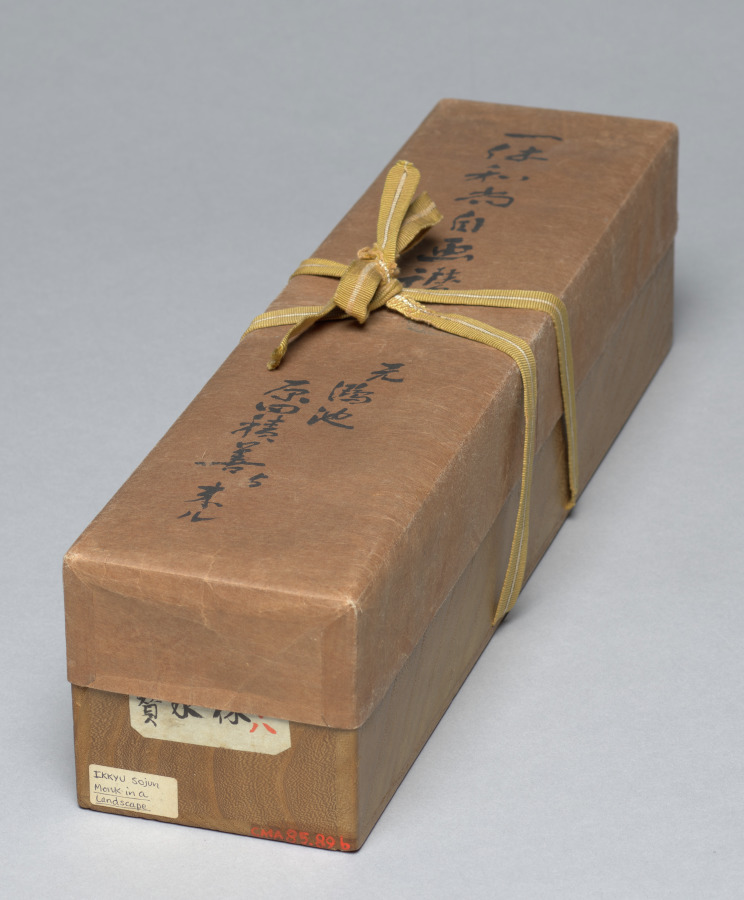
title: Listening to the Wind in the Pines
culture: Japan, Muromachi period (1392–1573)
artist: Ikkyū Sōjun (Japanese, 1394–1481)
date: 1400s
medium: hanging scroll; ink on paper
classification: Painting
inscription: 山居僧聴松風/何須臨済徳山禅一箇住山/三十年公案工夫了畢後/長松風静罷参眠 (transcribed by Trevor Menders with Zheng Xiaoying 2017, revised by Osvaldo Mercuri 2021)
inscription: 紫野龍寶門客东海純一休老和尚畫と詩一筆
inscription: 落款 一休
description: A monk sits in contemplation below an overhang covered with pine. The poem, titled "Monk in the Mountains Listening to the Wind in the Pines," refers to two Chinese Chan (Zen) Buddhist monks active in the ninth century. It may be translated as follows: Why must the Zen of Rinzai (Linji Yixuan) and Tokusan (Deshan Xuanjian) reside in a single temple for thirty years? Once he's solved his kōan, (the monk) ends his practice and falls asleep in the quietness of the wind among the tall pines. (translated by Osvaldo Mercuri) According to an inscription following the poem, both painting and verse were done by an eminent Japanese Buddhist monk known for revitalizing the Kyoto temple Daitokuji.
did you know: The word mountain, appearing in the title to the poem on this painting, can also refer to a temple.